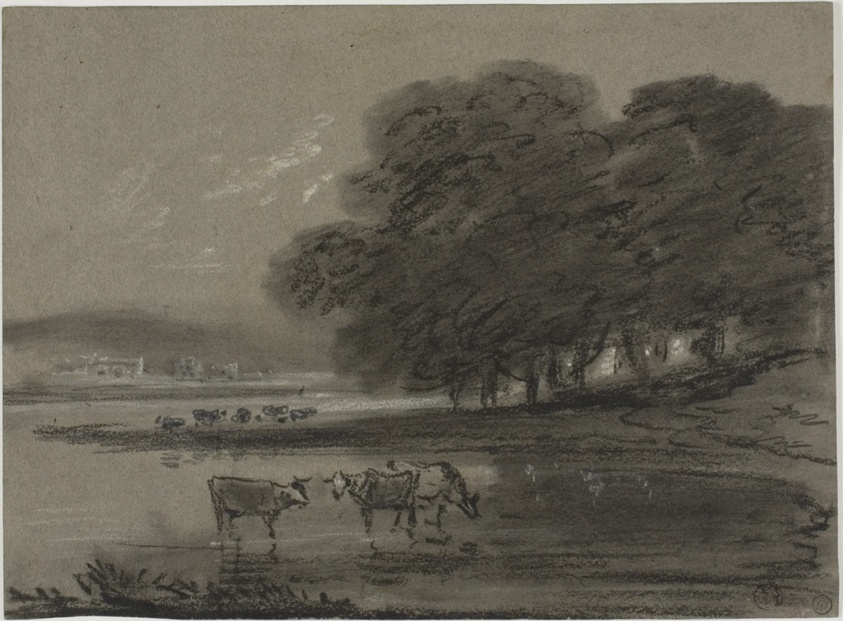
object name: Drawing and Watercolor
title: Landscape with Cows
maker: Thomas Monro (English, 1759-1833); or Thomas Gainsborough (English, 1727-1788)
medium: Black chalk, with black and white crayon, on gray wove paper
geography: England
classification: chalk; drawings (visual works); prints and drawing